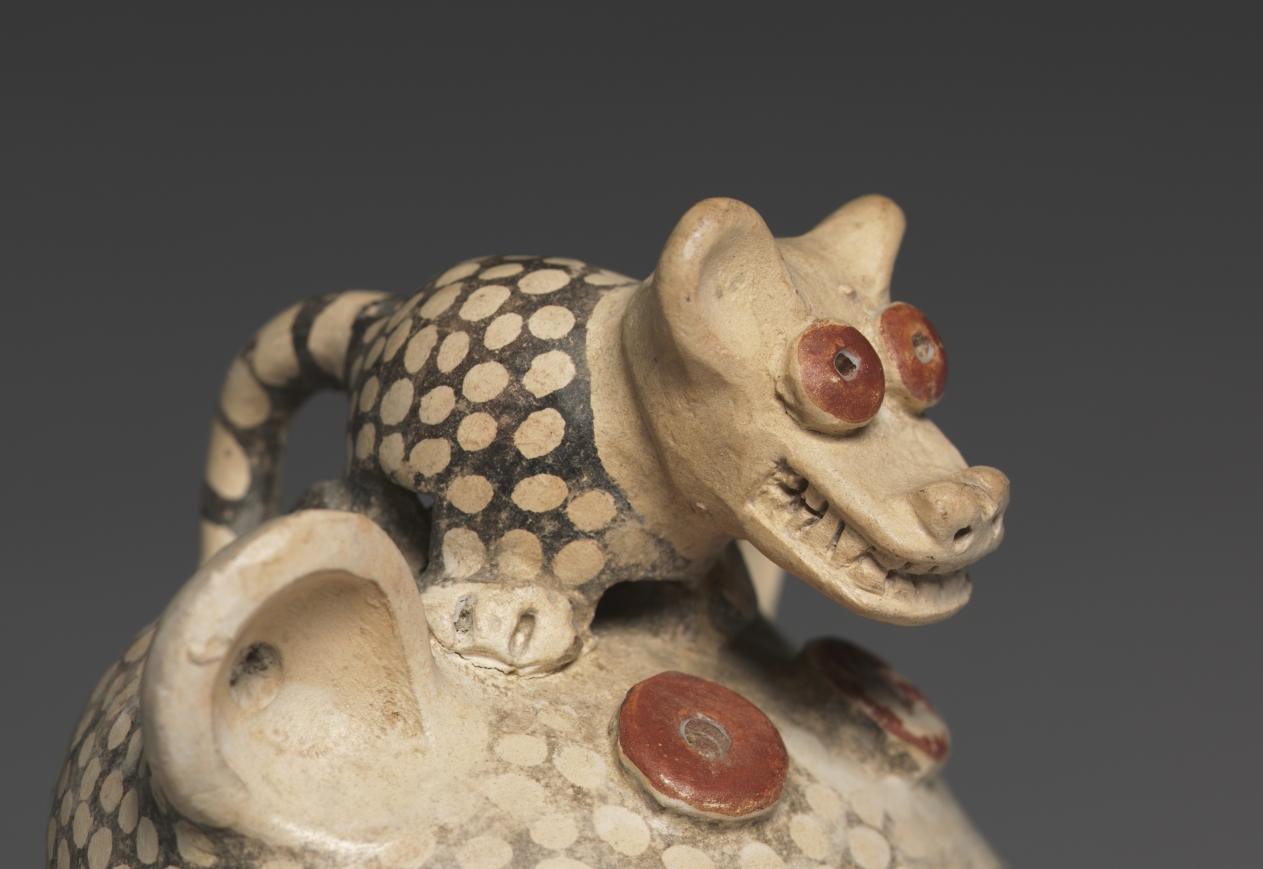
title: Feline Vessel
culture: Central Andes, North Highlands, Recuay people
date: 1–700 CE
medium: ceramic, red and white slips, black pigment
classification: Ceramic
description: Recuay art is under-studied and it is difficult to know the meaning of the wonderfully stylized feline on whose head perches a small passenger that may be a coatimundi, a nosy, busy, racoon-like animal. Elsewhere in Recuay art, felines are shown as virile predators, making it likely that in general they were symbols of leadership. The feline is painted with white and red slips; after firing, a resist application of black pigment was used to create the dotted pattern.